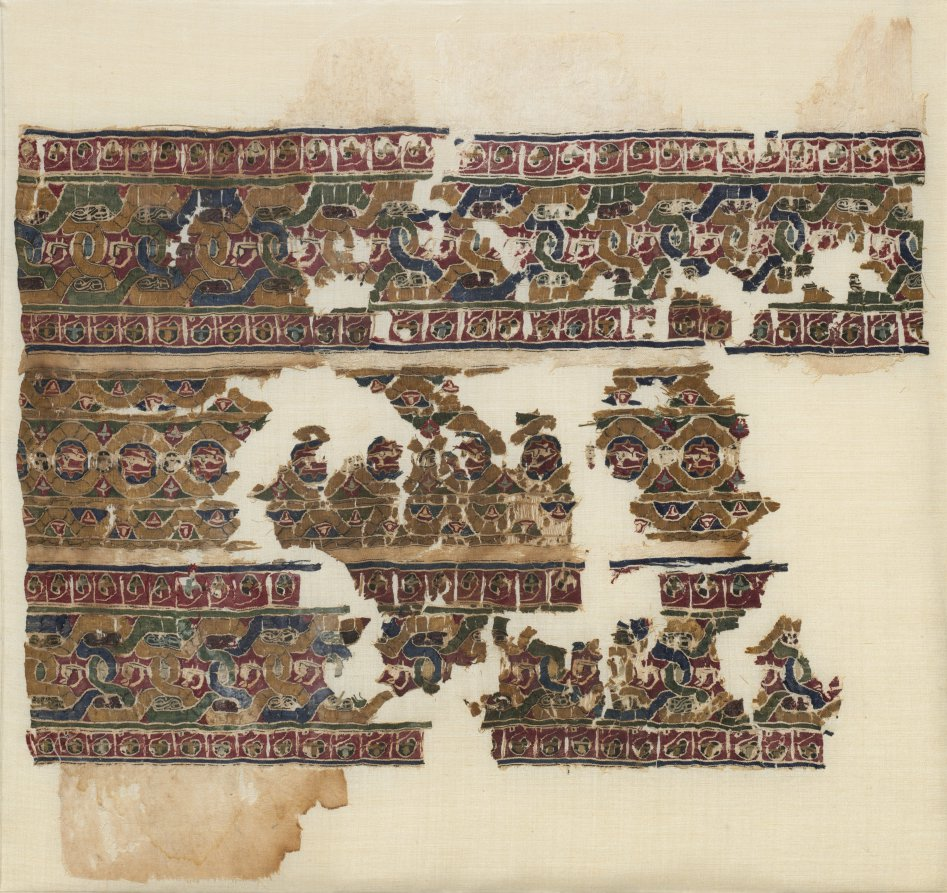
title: Tiraz with guilloche bands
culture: Egypt, Fatimid period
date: 1075–1125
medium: plain weave with inwoven tapestry weave: linen and silk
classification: Textile